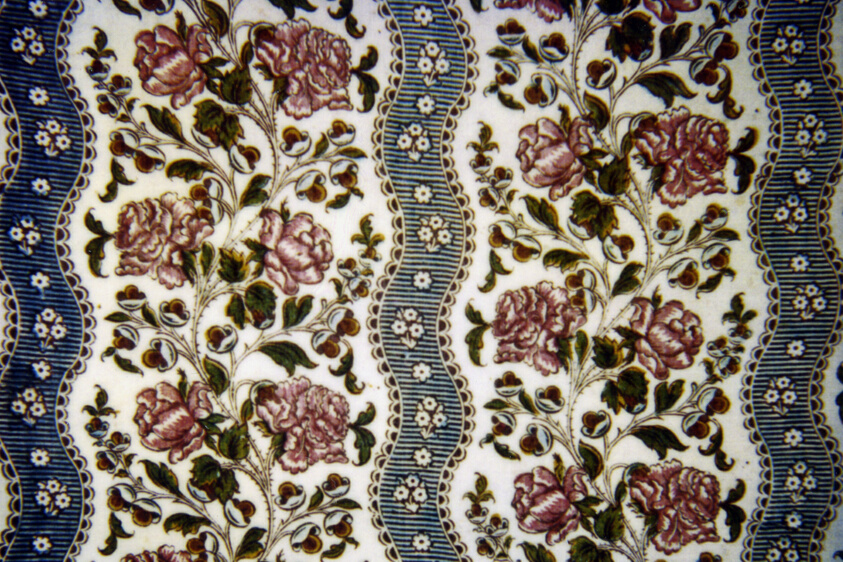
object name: Textile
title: Panel Entitled "Blue Ribbon"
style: jouy-en-Josas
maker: Manufactured by Christophe-Philippe Oberkampf (naturalized French, 1738-1815), Oberkampf Manufactory (French, 1760-1843); Jouy-en-Josas, France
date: 1760/64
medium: Linen and cotton, plain weave; block printed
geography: Jouy-en-Josas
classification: textile; weaving - printed